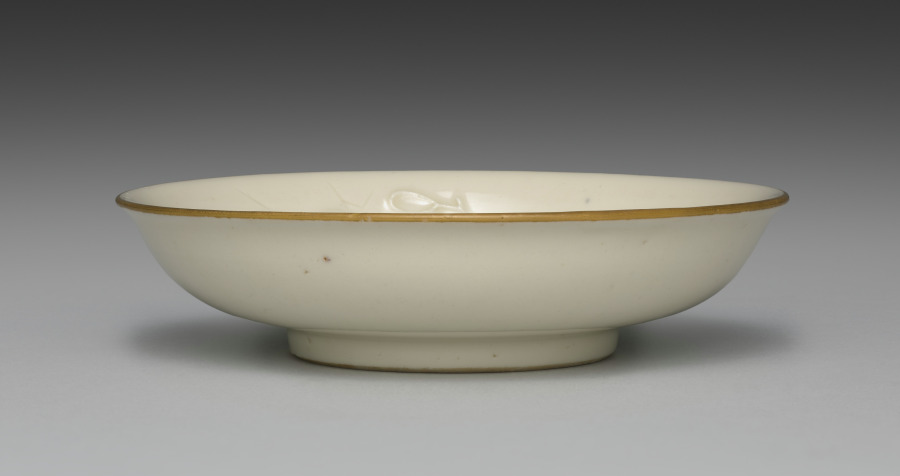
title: Small Dish from Dining Set with Plum Blossoms and Cracked-Ice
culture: Japan, Meiji period (1868–1912)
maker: Seifū Yohei II (Japanese, 1844–1878)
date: c. 1875–78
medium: Porcelain with molded designs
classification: Ceramic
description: Each item in this set has a delicate low-relief design of flowering plum branches over scattered, intersecting lines meant to resemble the cracked-ice surface of a frozen body of water and is signed on the base in gold pigment. While Yohei II produced many fine works in underglaze blue, like those produced by Kiyomizu Shichibei, he also made works in quite different styles later in his career, from the early 1870 s. In 1873, he was appointed purveyor to the Industrial Center of Kyoto Prefecture, a designation associated with Kyoto’s efforts to reach an international market through the port of Kobe; and from 1875 until his death, he was involved in national-level projects to present Japanese ceramics across the world. It was during this period that Yohei III was apprenticed to Yohei II, and it has been suggested that this set may in fact be an early example of Yohei III’s work, which he signed with his teacher’s name. Decorated with flowers resembling Japanese textile motifs, the set calls to mind the design of Yohei II’s pair of vases with plum blossoms in the Victoria and Albert Museum. Here, the elaborate trees created for a formal public exhibition setting have been translated into the approachable blossoms of the genteel domestic environment. While the designs are consistent across the pieces, each raised flower petal and pistil and each incised line in the ice was done by hand, so the cups, bowls, and dishes are similar yet unique. The bottoms of two boxes once identified the set’s owner, but the information has been deliberately obscured with black ink. However, inscriptions still visible appear to indicate two occasions, once at the end of July 1886 , and once again in June 1916 , when parts of the set were requested from Hokura in Niigata Prefecture. The location corresponds to a neighborhood in the present-day city of Jōetsu. The surname Tsuji 辻 also appears on a paper tag affixed to one of the box cloths. Future research may possibly reveal more about their provenance. A vase by Yohei III in a private collection combines the formal grandeur of the Yohei II vases in the Victoria and Albert Museum with the gentler design of this dining set, placing flowering plum trees against soft, scalloped-edge clouds resembling those in golden screens.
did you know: The dining wares have a creamy white coloration that the four boxes containing them identify as Korean in style.